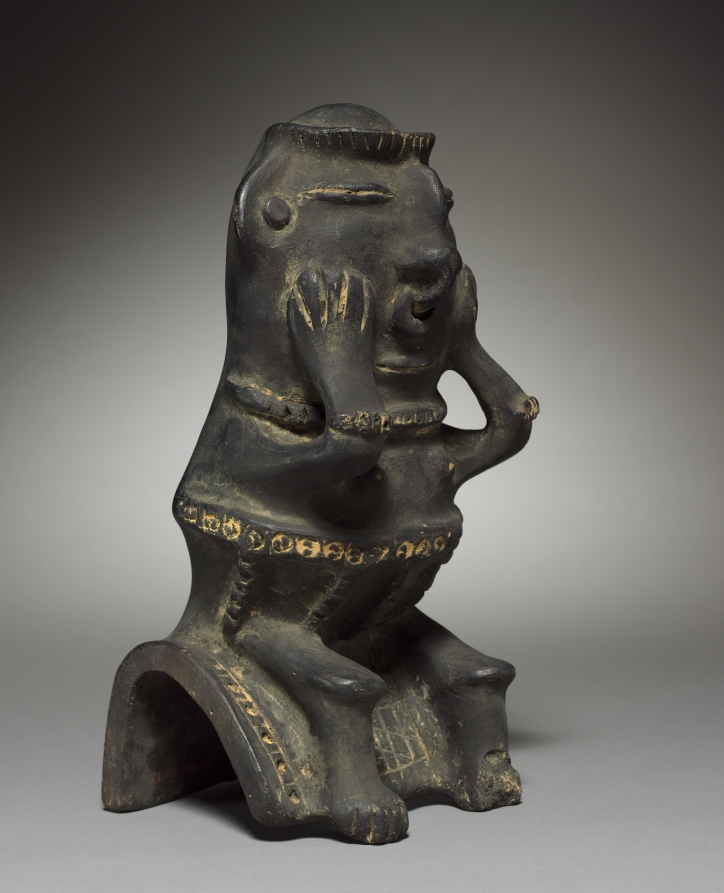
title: Seated Figure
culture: Colombia, Pre-Columbian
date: before 1921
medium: earthenware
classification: Ceramic